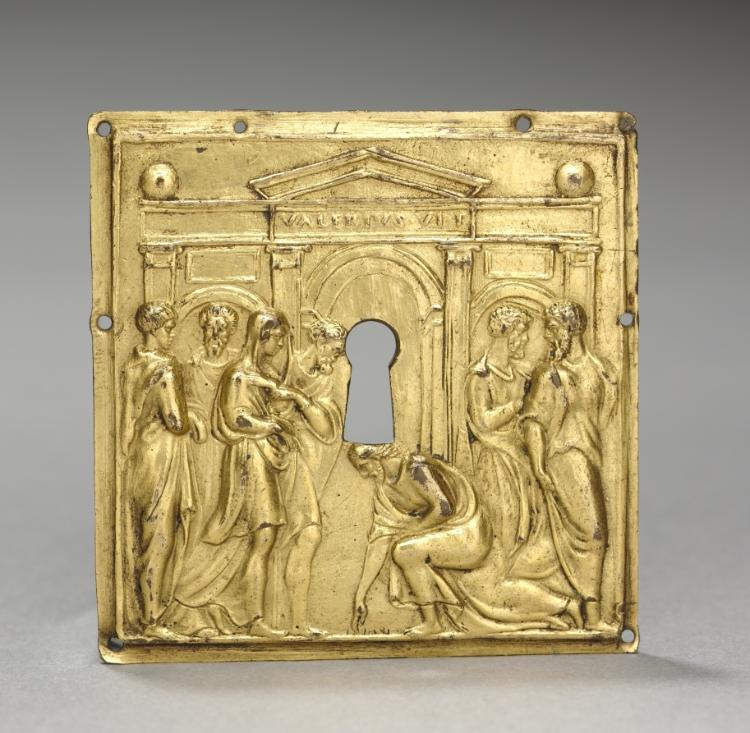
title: Christ and the Woman Taken in Adultery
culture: Italy, 16th century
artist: cast after a model by Valerio Belli (Italian, c. 1468–1546)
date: c. 1535 or later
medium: gilt bronze (later perforated with a keyhole)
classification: Sculpture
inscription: inscribed on the architrave: VALERIVS VI F.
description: In the Gospel of John, a group of scribes and Pharisees, following the law of the Ten Commandments, intends to stone a woman who has committed adultery. The group first asks Christ's opinion of their actions, hoping to accuse him of heresy, but Christ ignores them by writing on the ground. When they persist Christ tells them, "He who is without sin among you, let him first cast a stone at her." First and foremost a gem and rock crystal engraver, Belli's plaquettes are often casts made from designs he had already made in rock crystal. This work was cast after one of 24 carved rock crystal scenes from the life of Christ that adorned a silver gilt casket Belli created for Pope Clement VII in 1532. The keyhole cut into this plaquette was added later.